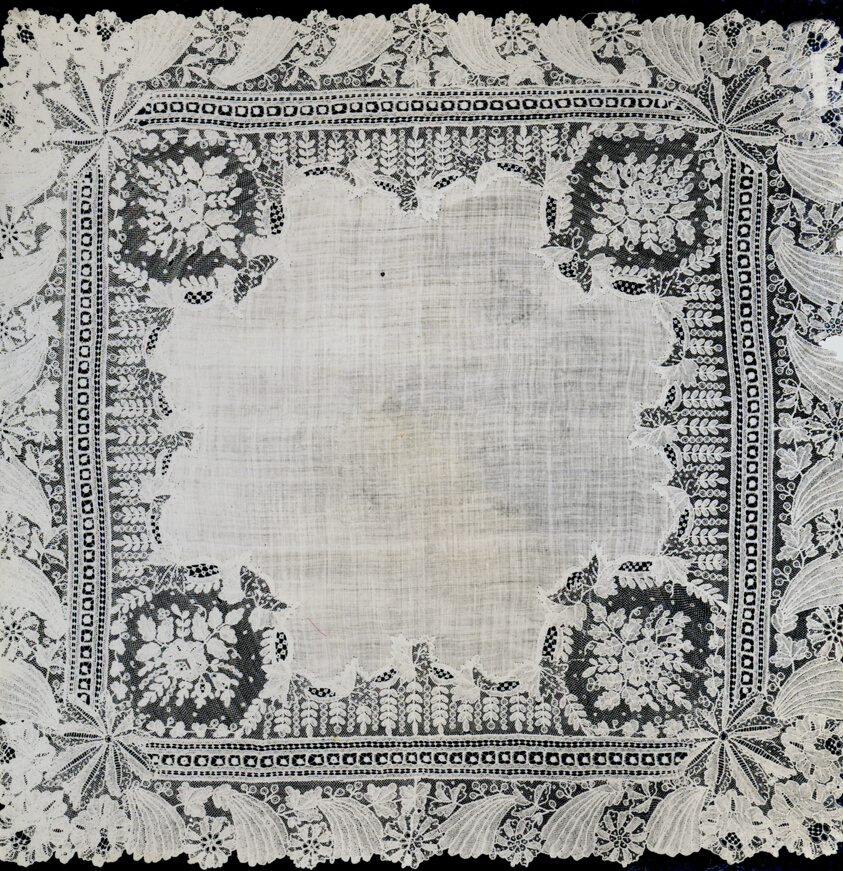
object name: Textile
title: Handkerchief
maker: Belgium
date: 1875/1900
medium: Linen, plain weave; edged with cotton, needle lace of a type known as "Point de Gaze"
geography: Belgium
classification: textile; lace - needle